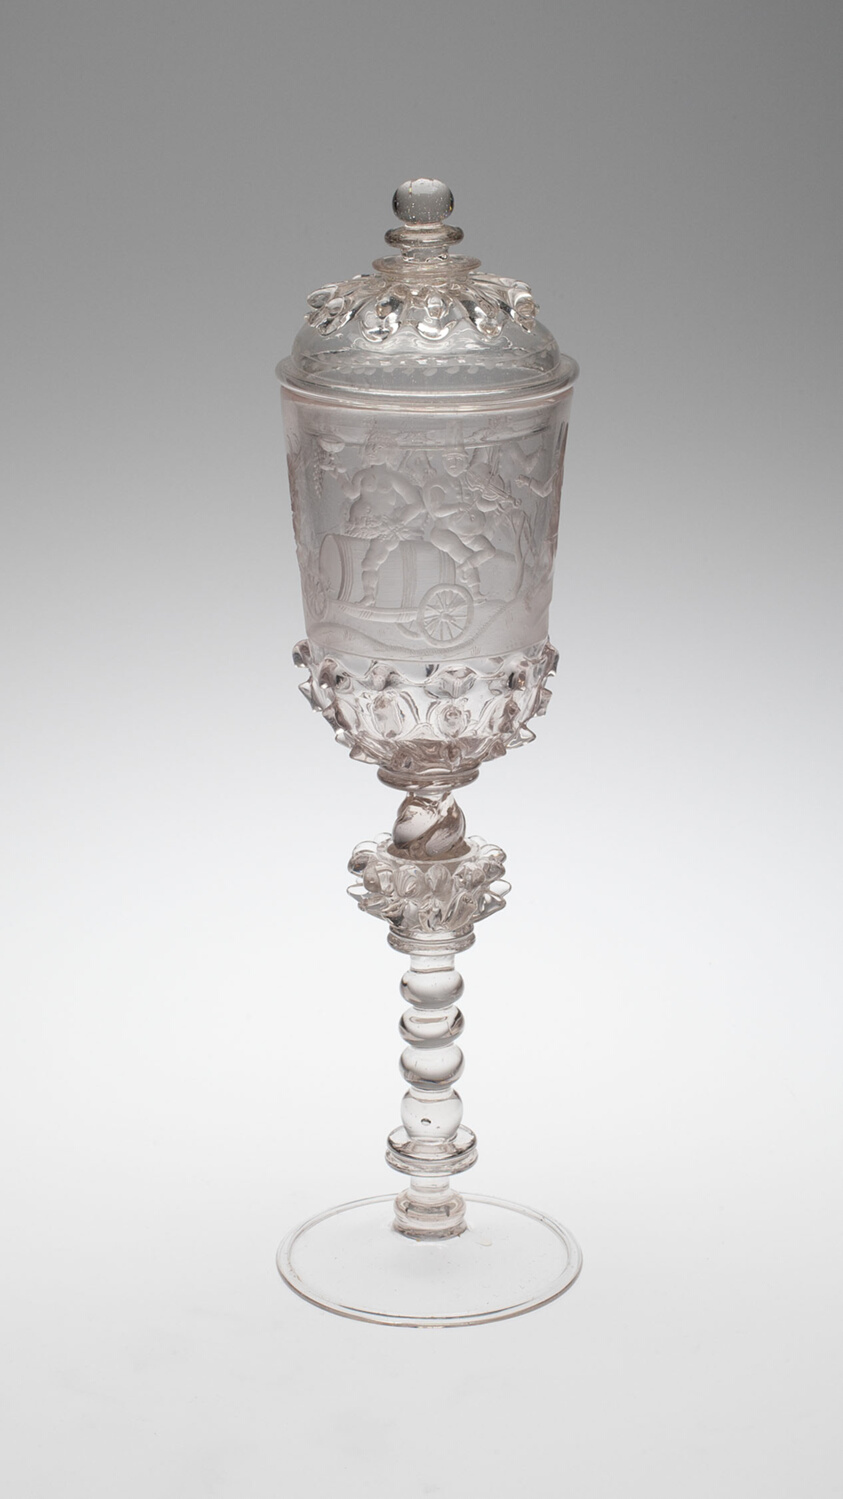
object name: Glass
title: Covered Goblet (Pokal)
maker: Bohemia, Czech Republic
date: c. 1730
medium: Glass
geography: Bohemia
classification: drinking vessel; glass; european decorative arts